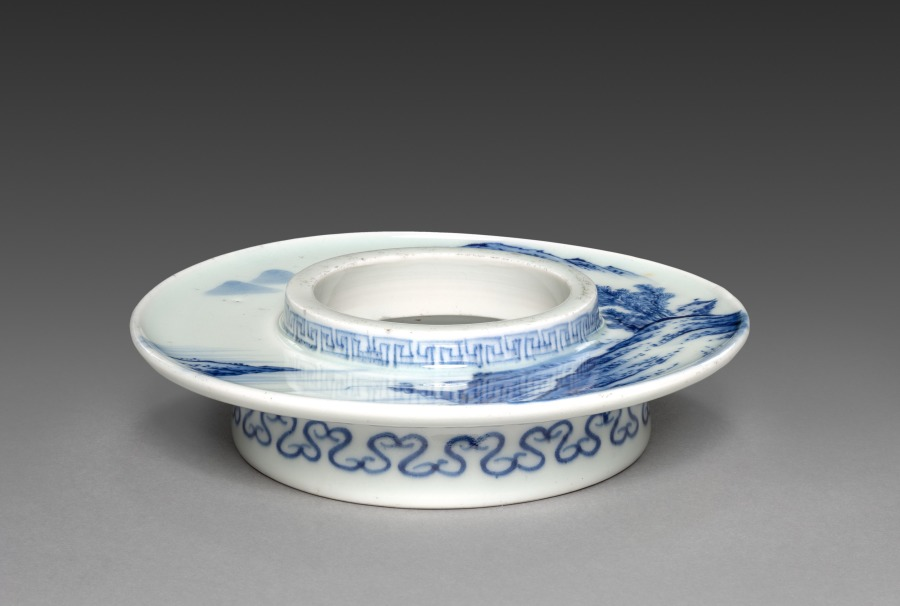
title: Cup Holder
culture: Japan, Edo period (1615–1868)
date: early to mid-1800s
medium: porcelain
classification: Ceramic